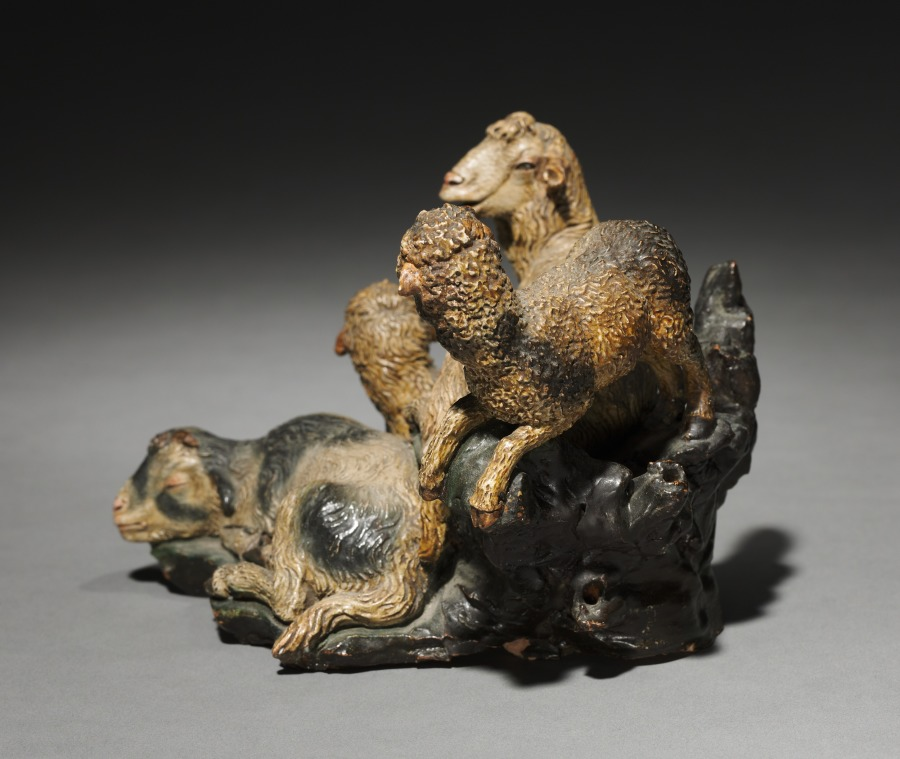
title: Figure from a Crèche: Group of Four Sheep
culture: Italy, Naples, late 18th-early 19th century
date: 1780–1830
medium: painted terracotta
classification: Sculpture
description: The practice of creating scenes of the Nativity for the home dates from the early 1700s in Italy, where people began to set up doll-like figures of about a foot or less in height. The custom was particularly popular in Naples around 1800, where crèche scenes (crèche means cradle, or crib) included many figures, whose heads and hands of painted terracotta, stuffed cloth bodies, and clothing adapted from contemporary local costumes gave them an amazingly realistic character. Representations of the birth of Jesus can be traced to the first few centuries of Christianity. Both living creatures and sculptural depictions of them were used from early times. By the late middle ages it was customary to create life-size figures of wood or stone, naturalistically painted, to represent the characters who participated in the events of Jesus's early life. These sculptures were then arranged in scenes illustrating one or both of the most important of these events, the Adoration of the Shepherds and the Adoration of the Magi-the three kings from the East who came to pay homage to the Christ child. Used in churches, these large figures were especially popular in Italy, Central Europe, Spain, and Portugal.